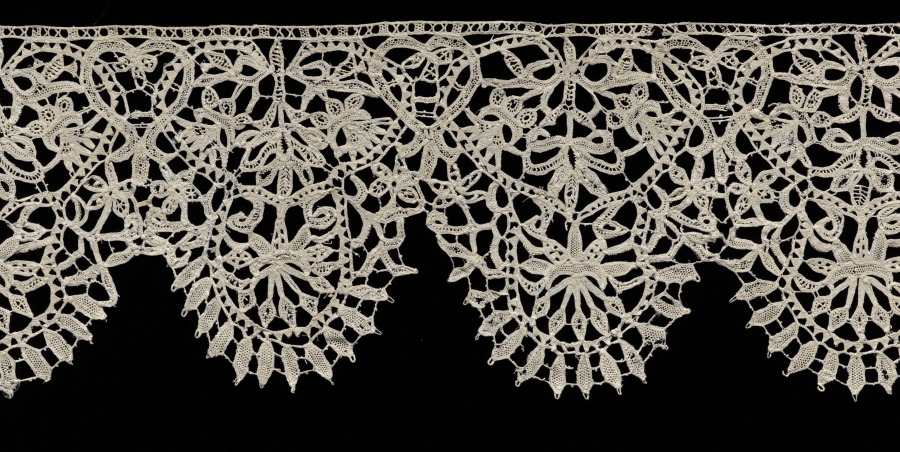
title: Lace Collar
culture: Italy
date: 1600–1640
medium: Needle lace (punto in aria)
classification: Lace